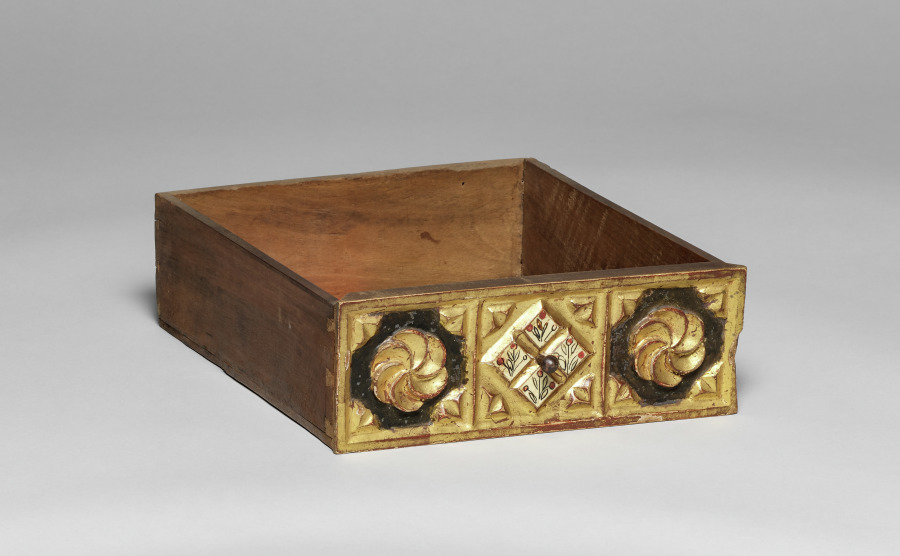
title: Chest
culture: Spain, Colonial, late 17th Century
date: late 1600s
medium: turned and joined wood, gilded and painted red with applied bone columns and bone inlays, wrought iron hardward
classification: Furniture and woodwork